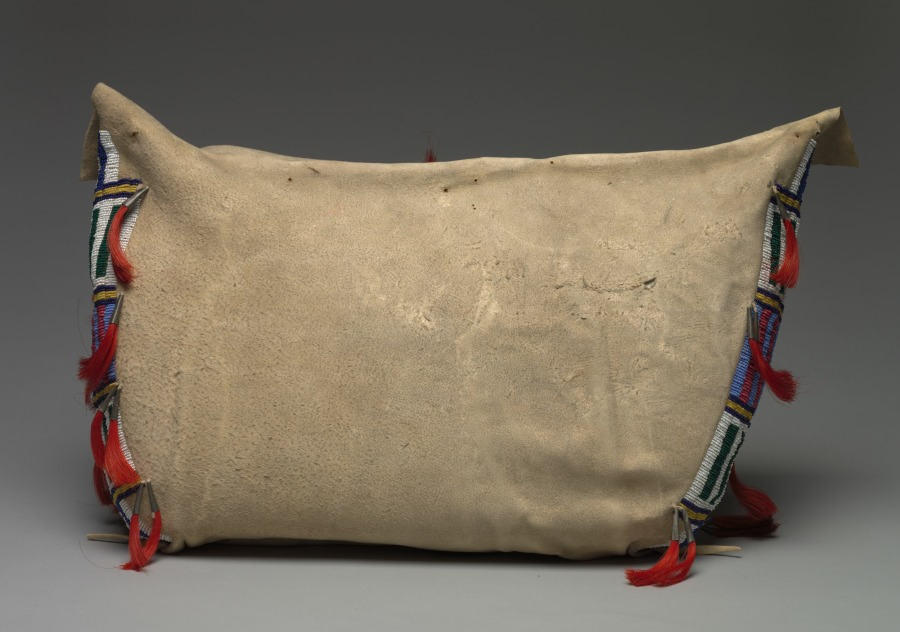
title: Storage Bag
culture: Native North America, Plains, Lakota (Sioux)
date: late 1800s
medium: Native-tanned hide, glass beads, dyed horsehair, tin cones, sinew thread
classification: Leather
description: Rectangular bags made of soft hide—known among early white traders as “possible bags” because they could hold “anything possible”—were used to store personal items inside the tipi, where they doubled as pillows. When encampments moved, the bags were carried on the side of a saddle, where their decoration could be admired.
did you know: Bags like this were used to store personal items inside the tipi, where they doubled as pillows.